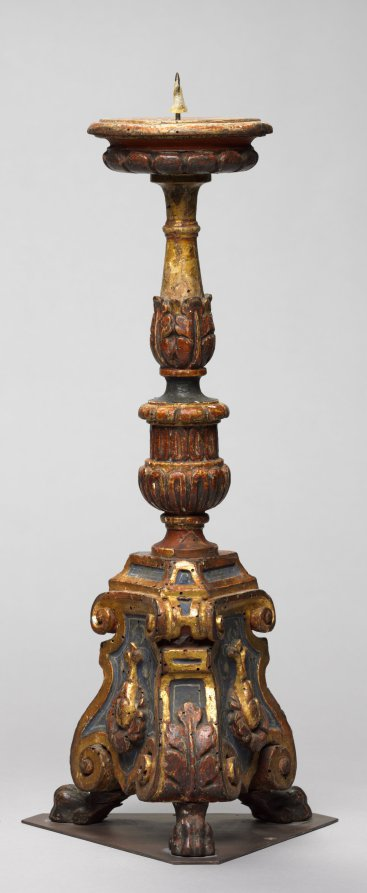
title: Candlestick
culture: Italy, probably Tuscany, late 15th century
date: late 1400s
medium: carved and gilded wood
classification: Furniture and woodwork